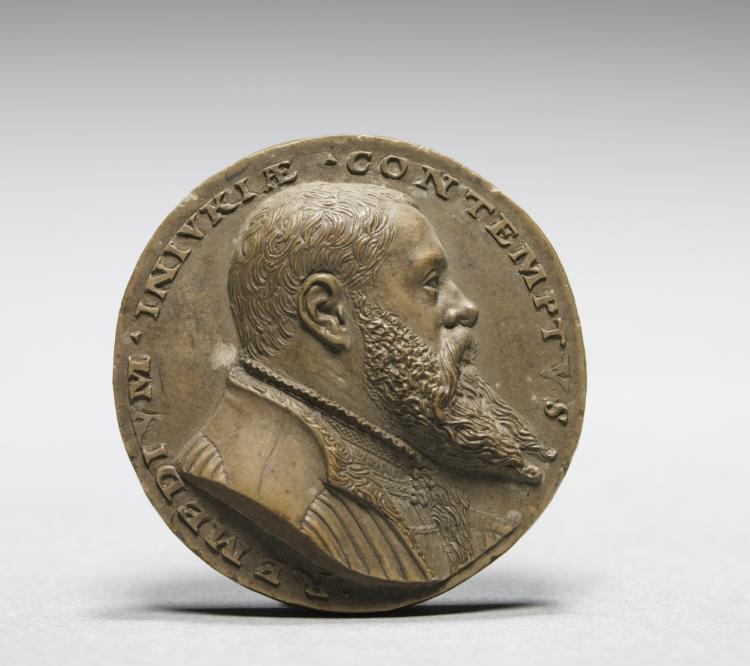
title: Model for the Obverse of the Medal of Son of Martin III Geuder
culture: Germany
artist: Matthes Gebel (German, c. 1500–1574)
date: c. 1535–1540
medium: Solnhofen limestone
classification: Sculpture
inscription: inscription: Remedium Inivkiae / sic / Contemptus.